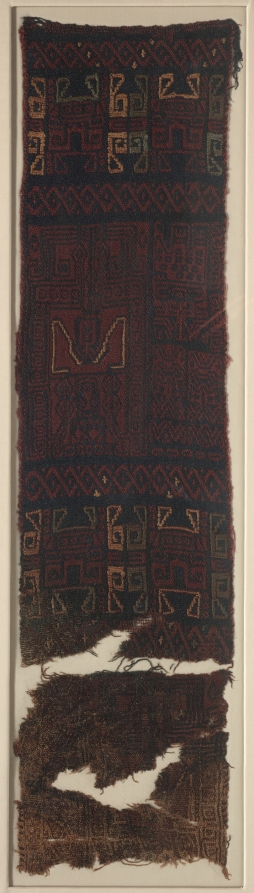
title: Textile Fragment with Frontal Deity Heads, Felines, and Interlace Pattern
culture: Peru, South Coast, Paracas, Yauca Valley(?)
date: 700–400 BCE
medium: camelid fiber; double-cloth with structural embroidery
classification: Textile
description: This textile fragment and (2005.13), belong to a group that represents Andean weavers’ earliest known achievements in double cloth, a technique that allows the creation of identical designs on both faces of the cloth but in reversed colors. They also record the devotion to abstraction typical of the Paracas style. One features three repeats of a highly geometrical standing deity with a fanged mouth. The other includes several stylized deity heads and a blocky, frontally posed feline. The type of garment that these fragments come from remains unknown.